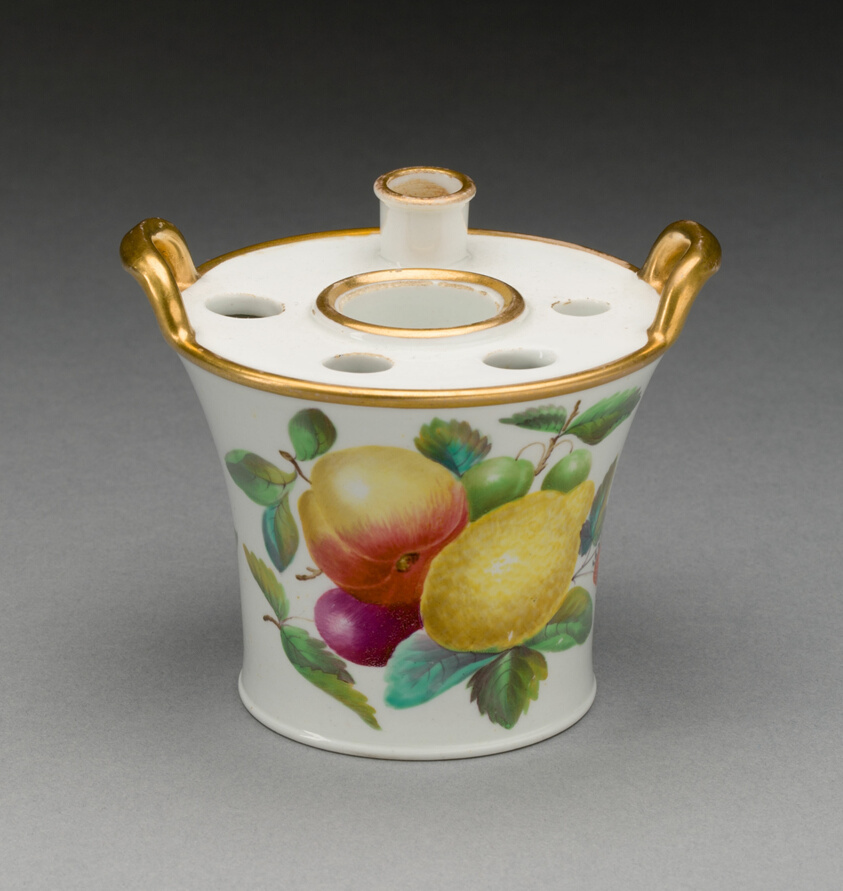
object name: Ceramics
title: Inkwell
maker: Wedgwood Manufactory (England, founded 1759)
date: c. 1820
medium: Porcelain with polychrome enamels and gilding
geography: Burslem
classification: porcelain; european decorative arts; ceramics